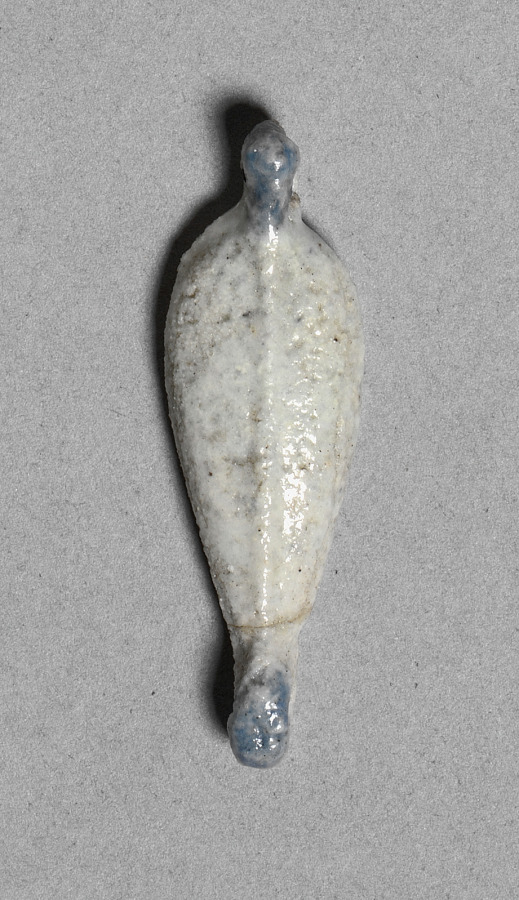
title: Petal-Shaped Bead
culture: Egypt, New Kingdom (1540–1069 BCE), Dynasty 18, reign of Amenhotep III (1390–1352 BCE)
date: c. 1391–1353 BCE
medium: faience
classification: Jewelry